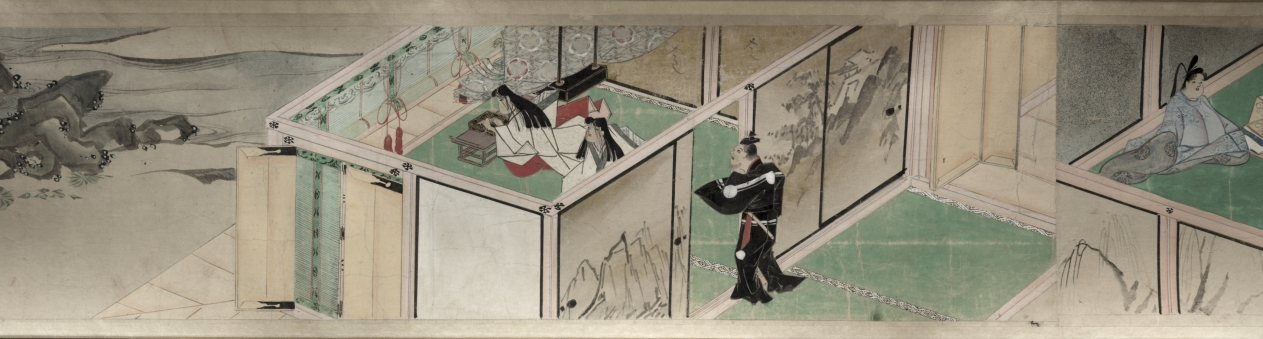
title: The Saltmaker's Story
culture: Japan, Edo period (1615–1868)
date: early 1600s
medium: One of a pair of handscrolls; ink, color, and gold on paper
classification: Painting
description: Once read and copied by girls at New Year’s celebrations and included in dowries, The Saltmaker’s Story is a rags-to-riches tale in which daughters are gifts from the gods. Despite his simple outlook, the main character progresses from humble roots as an associate at Kashima Shrine to the elite status of grandfather of the emperor through the intervention of the Kashima deity. The Saltmaker’s Story is traditionally presented in a set of three scrolls, but the text of this set has been removed by a previous owner, who remounted the illustrations as a pair. The paintings of this one take us from right to left through the second half of the tale.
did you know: This handscroll originally had texts before its paintings, but the texts were removed.